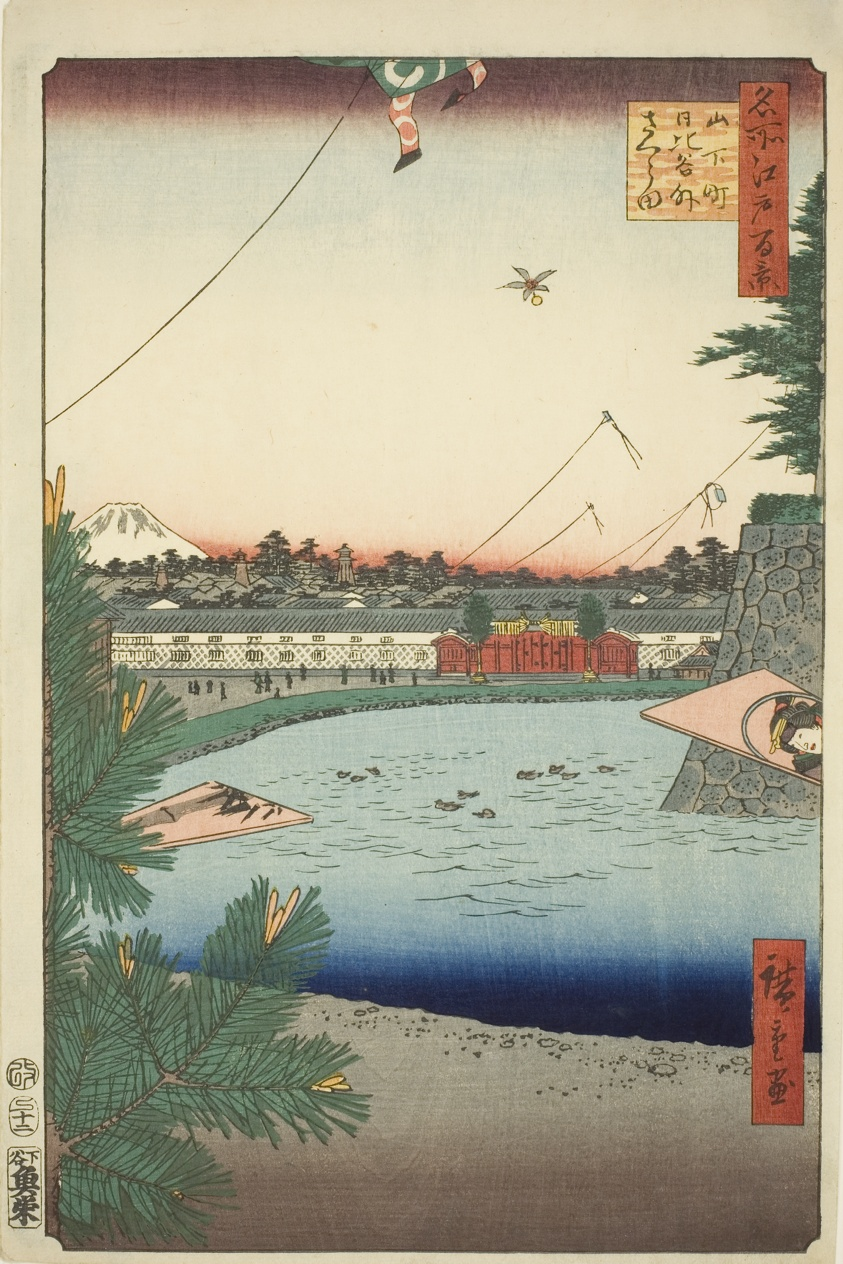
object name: Print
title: Hibiya and Soto-Sakurada from Yamashita-cho (Yamashita-cho Hibiya Soto-Sakurada), from the series "One Hundred Famous Views of Edo (Meisho Edo hyakkei)"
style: Japanese (culture or style)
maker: Utagawa Hiroshige 歌川 広重; Japanese, 1797-1858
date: 1857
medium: Color woodblock print; oban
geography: Japan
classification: woodblock print; print; asian art